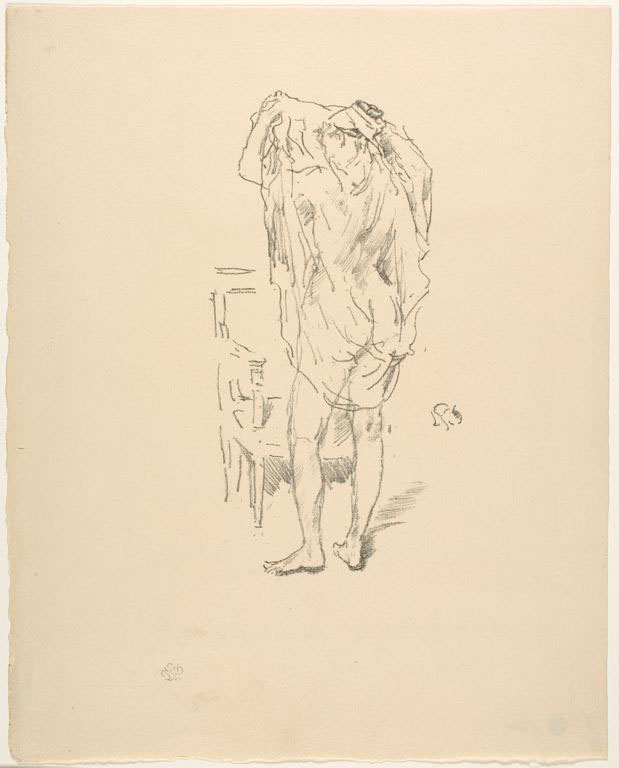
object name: Print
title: Study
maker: James McNeill Whistler (American, 1834-1903)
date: 1894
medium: Lithograph on cream laid paper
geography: United States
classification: prints and drawing; print; lithograph; paper